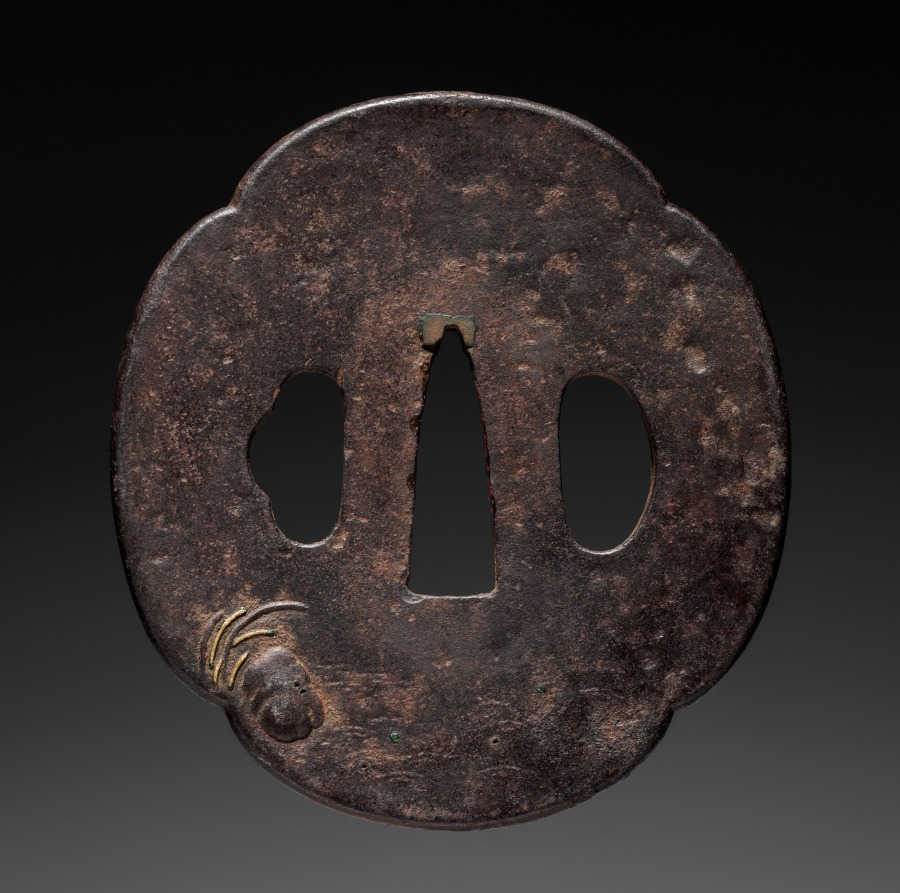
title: Sword Guard (Tsuba) with Fishing Sage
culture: Japan, Edo period (1615–1868)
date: late 1600s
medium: iron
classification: Arms and Armor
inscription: signed: 山城國伏見住金家